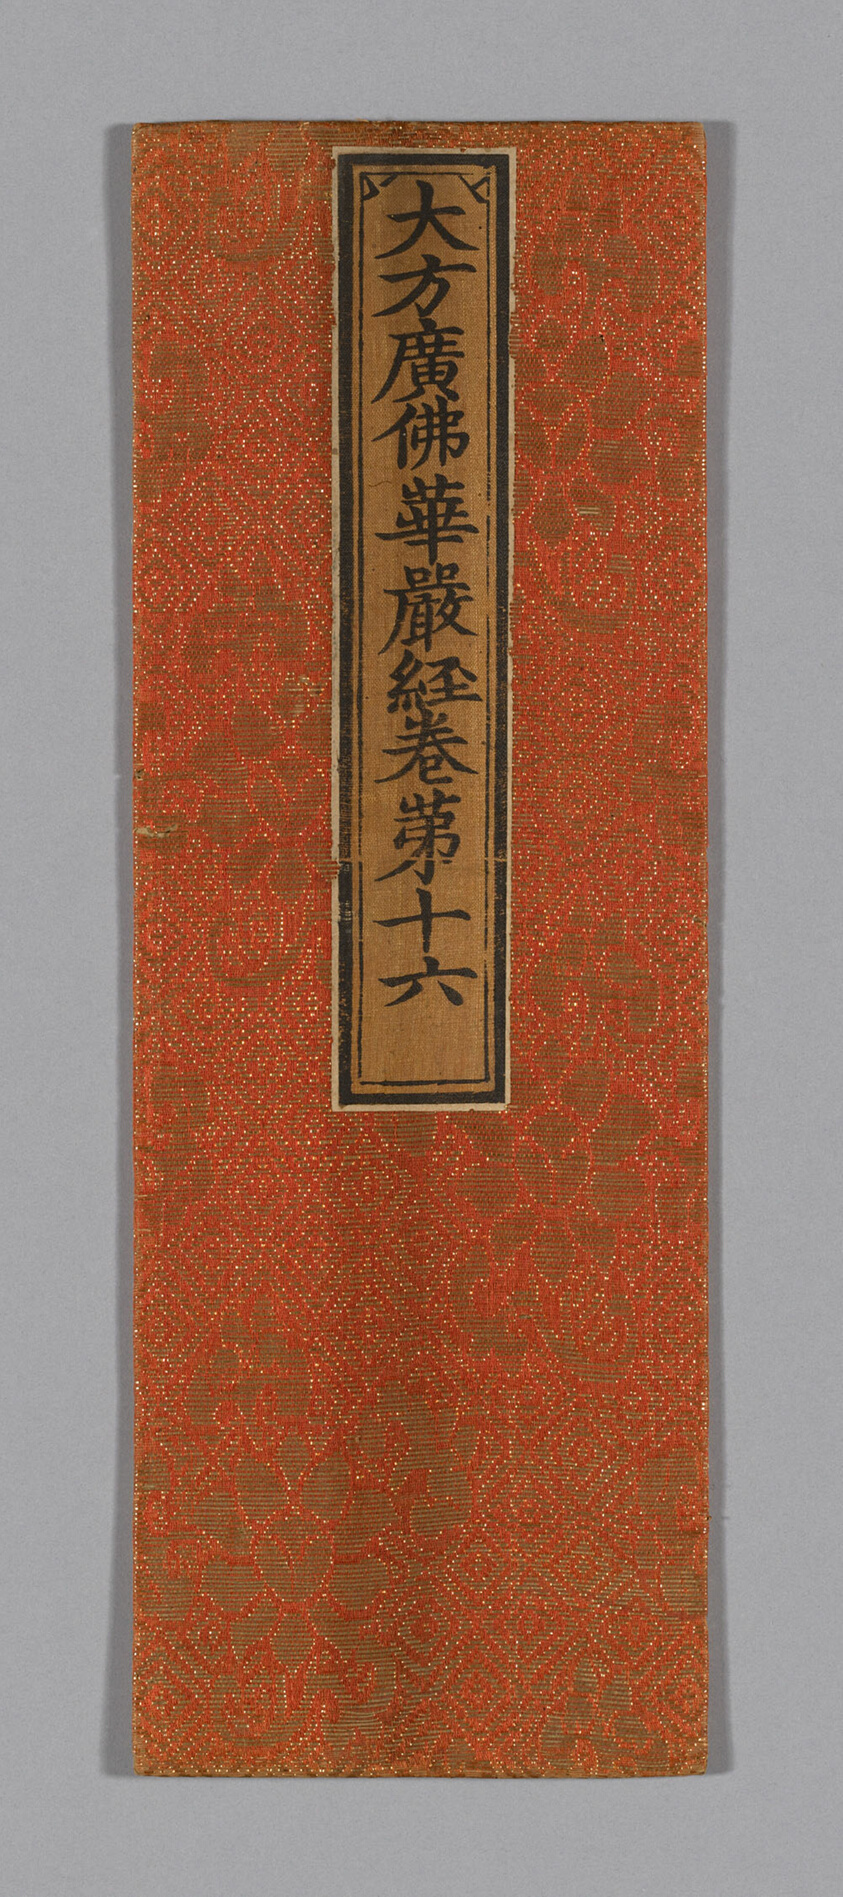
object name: Textile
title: Sutra Cover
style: ming, Chinese (culture or style), East Asian, asian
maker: China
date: Ming dynasty (1368–1644), c. 1590's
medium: Silk and gold-leaf-over-lacquered-paper strip, warp-float faced 4:1 satin weave with supplementary patterning wefts bound in weft-float faced 1:4 satin interlacings; label: silk, plain weave; painted in ink; glued to paper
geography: China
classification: textile; weaving